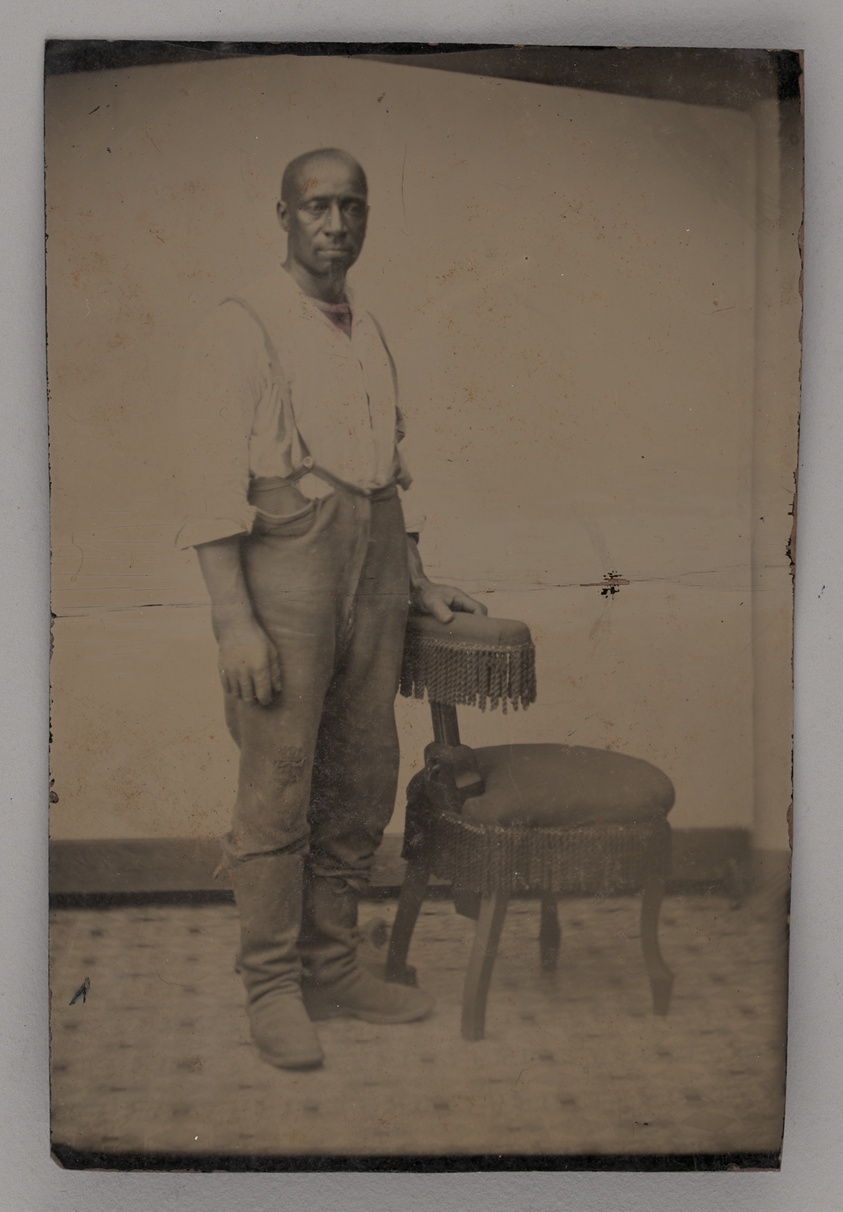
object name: Photograph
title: Untitled (Portrait of a Standing Man)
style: 19th century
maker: Unknown maker; American, 19th century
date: 1875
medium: Tintype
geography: United States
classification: portrait; tintype; photograph; photographic process; photography; portrait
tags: portraits: African American subject, lundberg collection, African American, portraits, Male, men, portraits: male subject, portrait